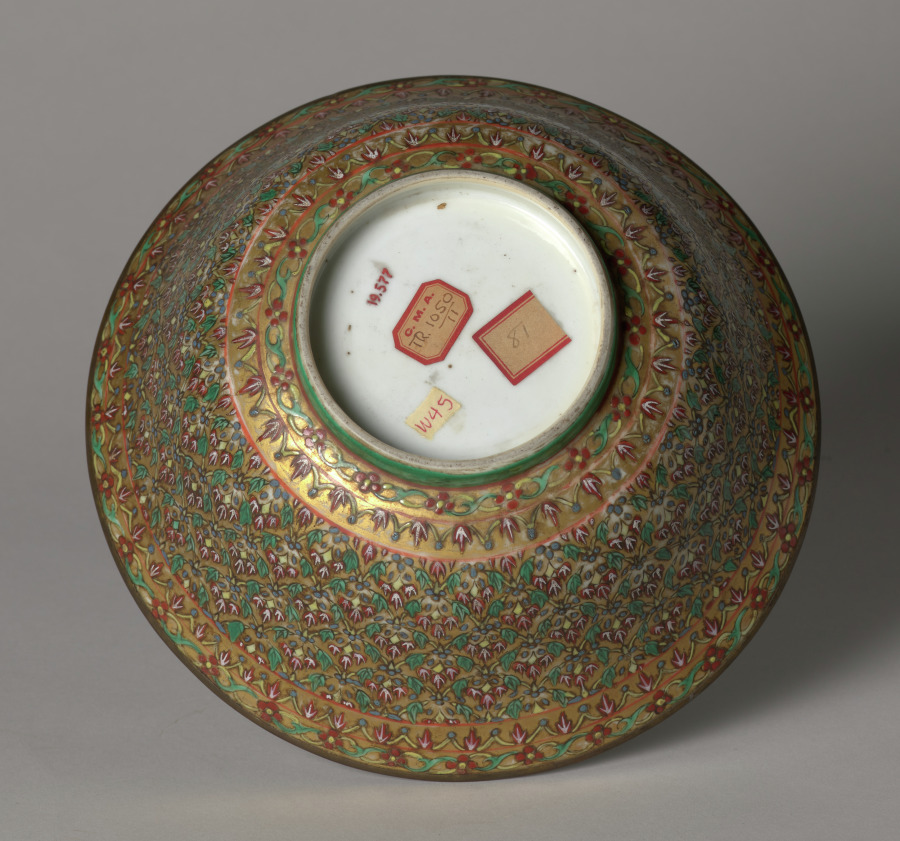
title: Chow Bowl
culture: Siam, 18th century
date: 1700s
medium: porcelain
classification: Metalwork